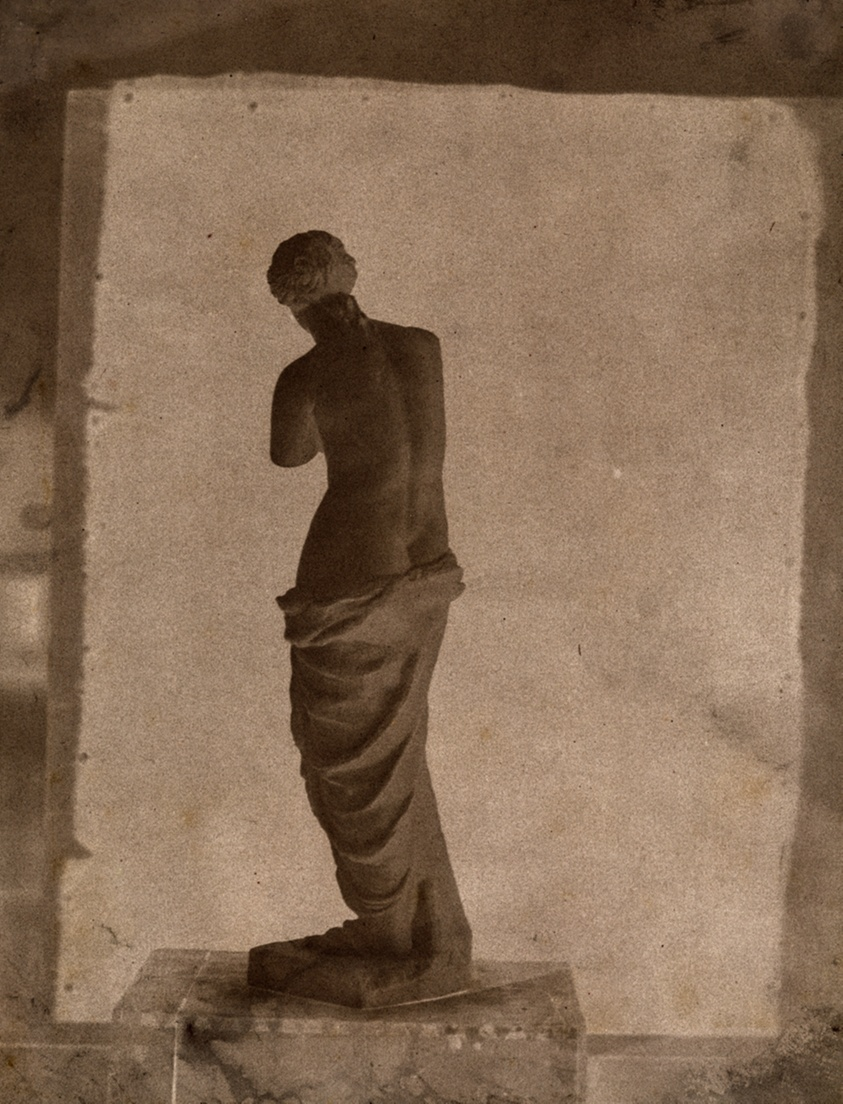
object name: Photograph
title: Untitled (Still life with a statuette of the Venus de Milo)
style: 19th century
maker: John Beasley Greene (American, born France, 1832–1856)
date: 1852-53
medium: Waxed paper negative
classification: photography; photograph; photographic process; black-and-white photography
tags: sculptures